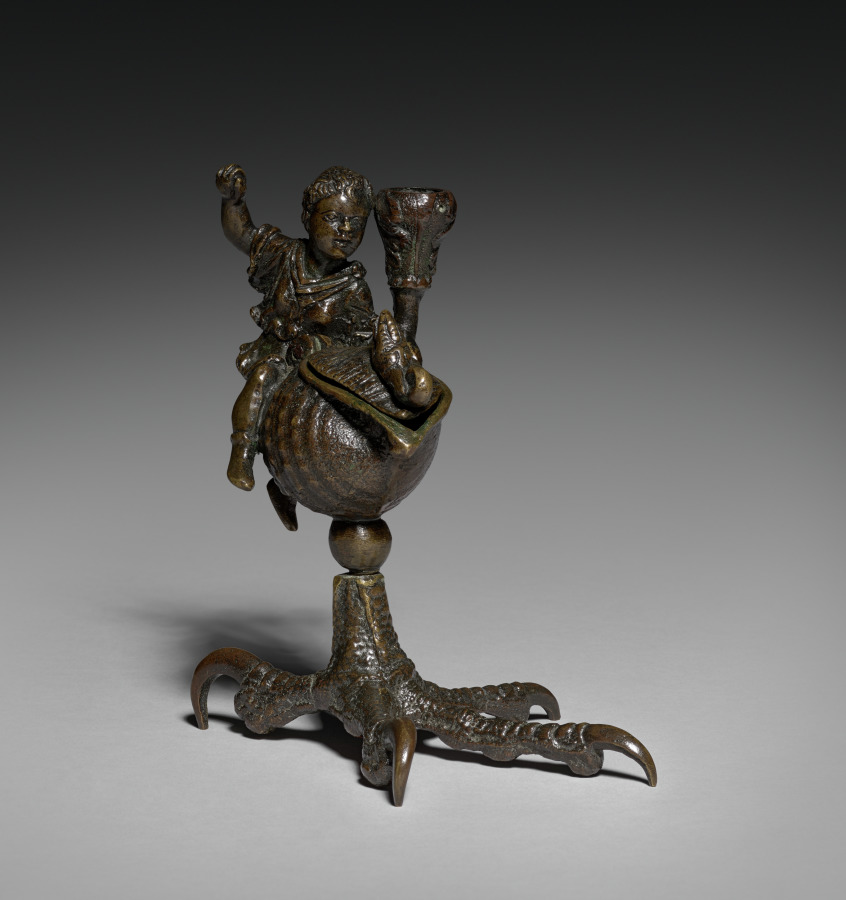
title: Inkwell and Candlestick with the Infant Hercules Killing the Serpents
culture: Italy, Ravenna, 16th century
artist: workshop of Severo da Ravenna (Italian, c.1496–c.1543)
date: c. 1510–20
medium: bronze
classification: Sculpture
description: In the early 1500s, Padua, a center of strong humanist traditions, encouraged the revival of classicism, and artists took their cues from descriptions in the works of classical authors. Classical small-scale bronzes grew in demand, and in response, the city's bourgeoning foundries produced a varied and extensive supply of small statues. Like many early Paduan bronzes, this work's utilitarian function—used to hold ink and to supply light—is complimented by its ornamental value. The base consists of an eagle claw, cast from life, supporting an equally realistic nautilus shell. Though medieval artists had occasionally used seashells to hold paints, the shell inkwell, whose small size makes it rather impractical to use, was a motif particular to Padua. Perched upon the shell is most likely Hercules, the son of Zeus. Perhaps aided by a staff (now missing) he is poised to strike a serpent, which according to myth was sent by Hera, the jealous wife of Zeus, to kill him. The dramatic opposition of hero and monster enhances the connection to the classical past, further meeting the desires of the educated patrons of Padua.